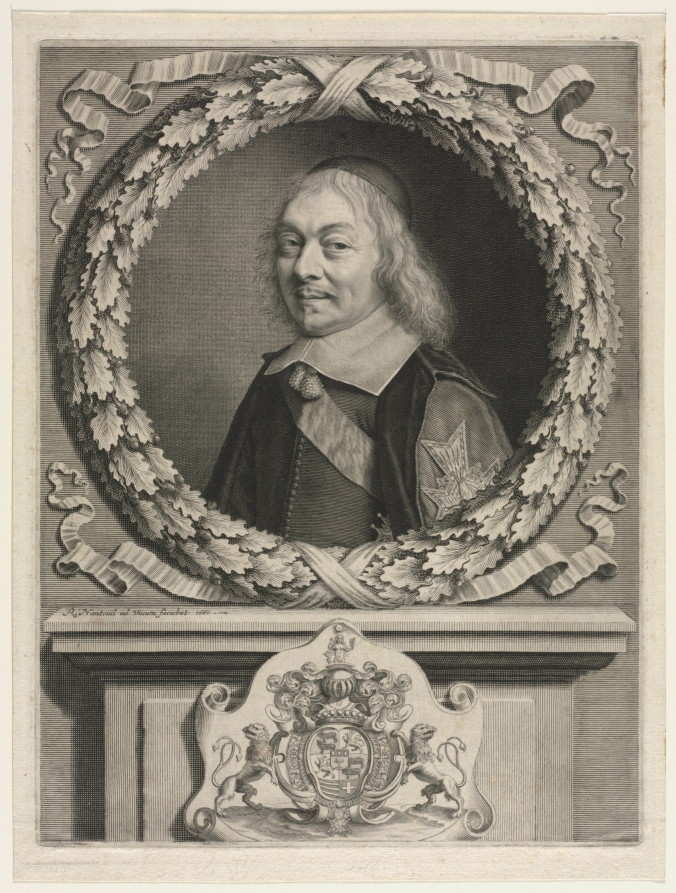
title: Henri-Auguste de Loménie Comte de Brienne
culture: France, 17th century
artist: Robert Nanteuil (French, 1623–1678)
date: 1660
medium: engraving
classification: Print